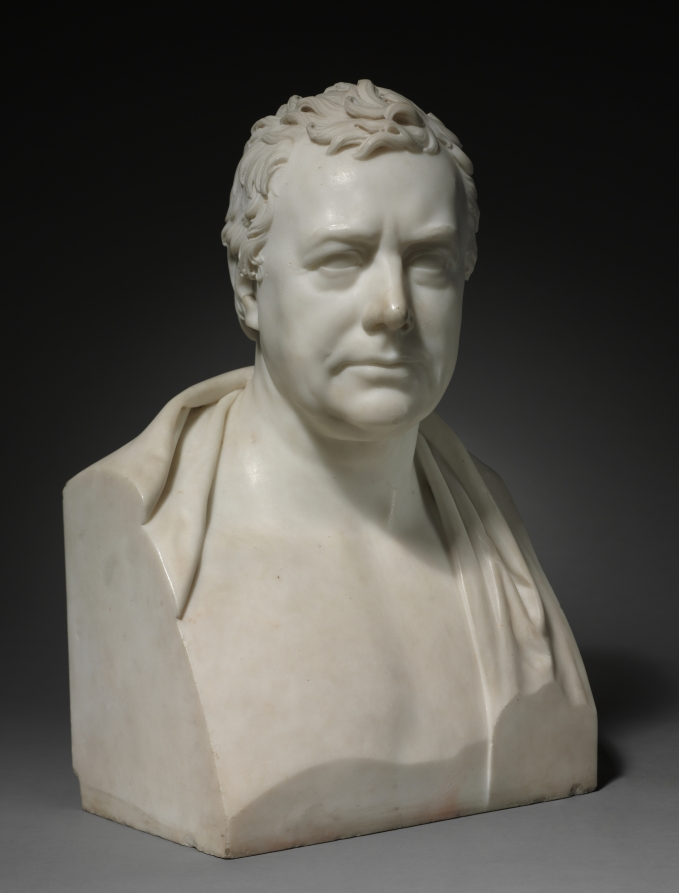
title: Sir H. C. Englefield, Bart.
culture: England, 19th century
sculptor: Francis Legatt Chantrey (British, 1781–1841)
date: 1818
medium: marble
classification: Sculpture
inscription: inscribed left side: Chantrey/Sculptor/1818; rear: Sir H. C. Englefield, Bart.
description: To modern eyes, a bare-chested portrait of a man in his mid-60s might seem undignified. However, it was fashionable for gentlemen of Englefield’s generation to be portrayed in this manner, deliberately referencing the antique sculptures of Roman statesmen they admired. As a Catholic, Englefield was barred from taking part in politics in England; however, he was a member of several clubs devoted to the amateur study of art, science, and history. Among these were the Society of Dilettanti, which championed the works of antiquity and promoted the creation of modern art in the same spirit—like this marble bust by celebrated sculptor Francis Legatt Chantrey.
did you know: Initially, Chantrey tried to establish himself as a portrait painter. After 1805, he painted only on occasion and from 1811–20, he became the leading portrait sculptor in Regency Era Great Britain.